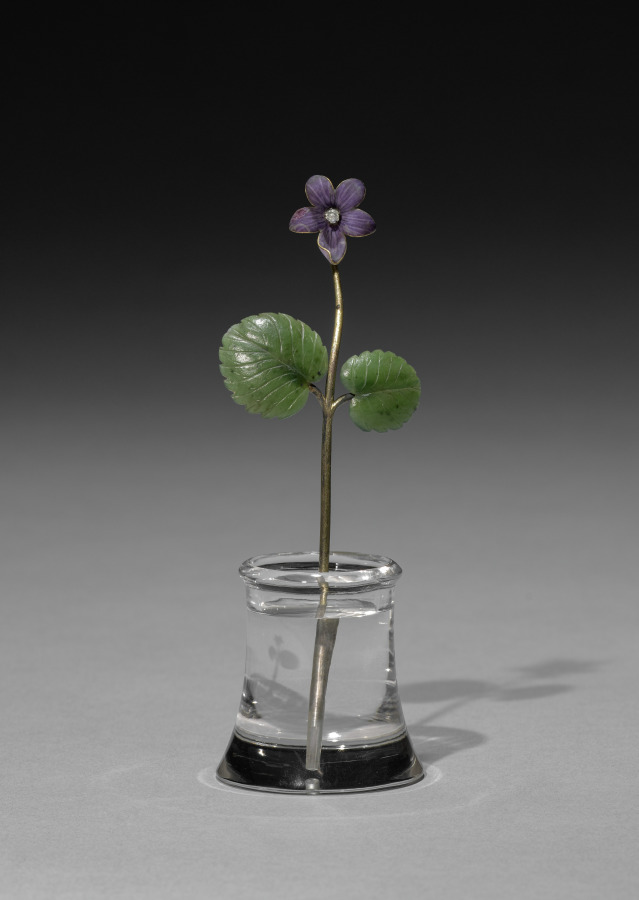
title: Flower Study of a Violet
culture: Russia, St. Petersburg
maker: House of Fabergé (Russian, 1842–1918)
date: c. 1885–1915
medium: enamel, silver gilt, jade, diamond, rock crystal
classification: Miscellaneous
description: This flower study depicts a single stem of violet. Fabergé’s inspiration for his flower studies is said to have come from the floral brooches of precious stones that were made in the 1700s for Catherine the Great as well as from the Japanese art of flower arranging, known as ikebana. Small and delicate, Fabergé’s flower studies were given as intimate gifts to friends by the tsarina and others in the court. She also liked to take them around to wherever the imperial family was residing as a reminder of spring during the harsh Russian winters.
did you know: The stems of Fabergé’s flower studies are set into little basins carved from rock crystal to resemble pots of water.